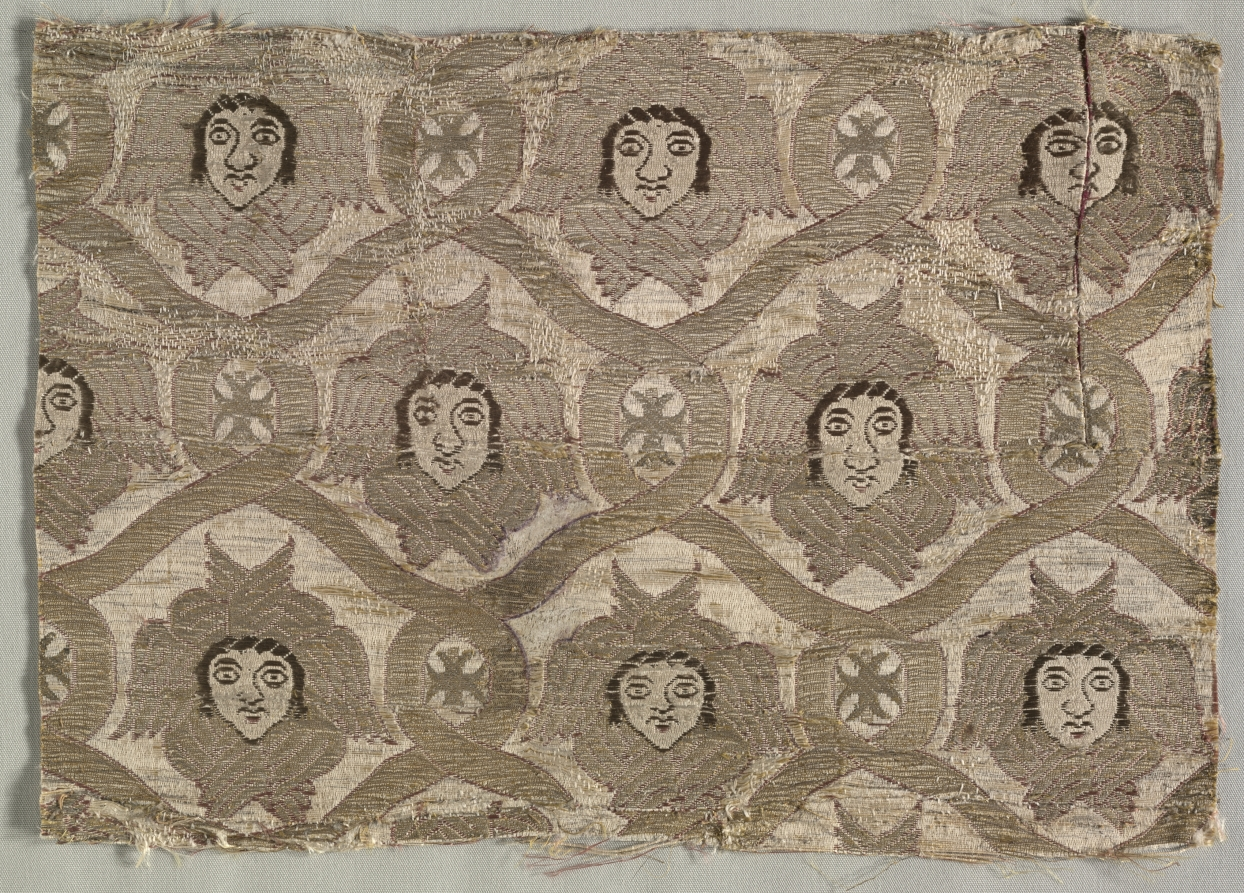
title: Heavy Gold Brocade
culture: Greece, Northern Islands, Chios ?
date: 1600s–1700s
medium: brocade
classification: Textile